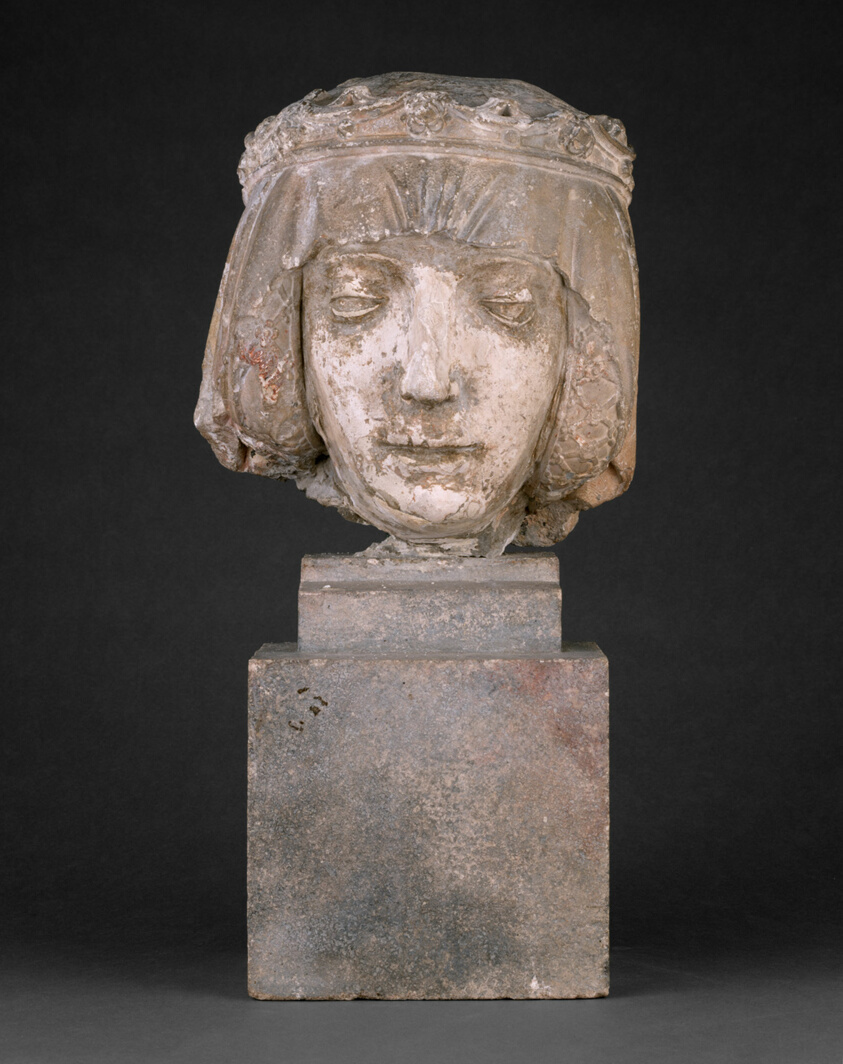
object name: Sculpture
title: Head of a Woman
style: 15th century, 16th Century, sixteenth century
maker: French; possibly Burgundy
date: c. 1450-1500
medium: Limestone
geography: France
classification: bust/head; sculpture; french; limestone; sculpture/stone; stone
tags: woman, busts, crowns, faces, Fragment, head, headdresses